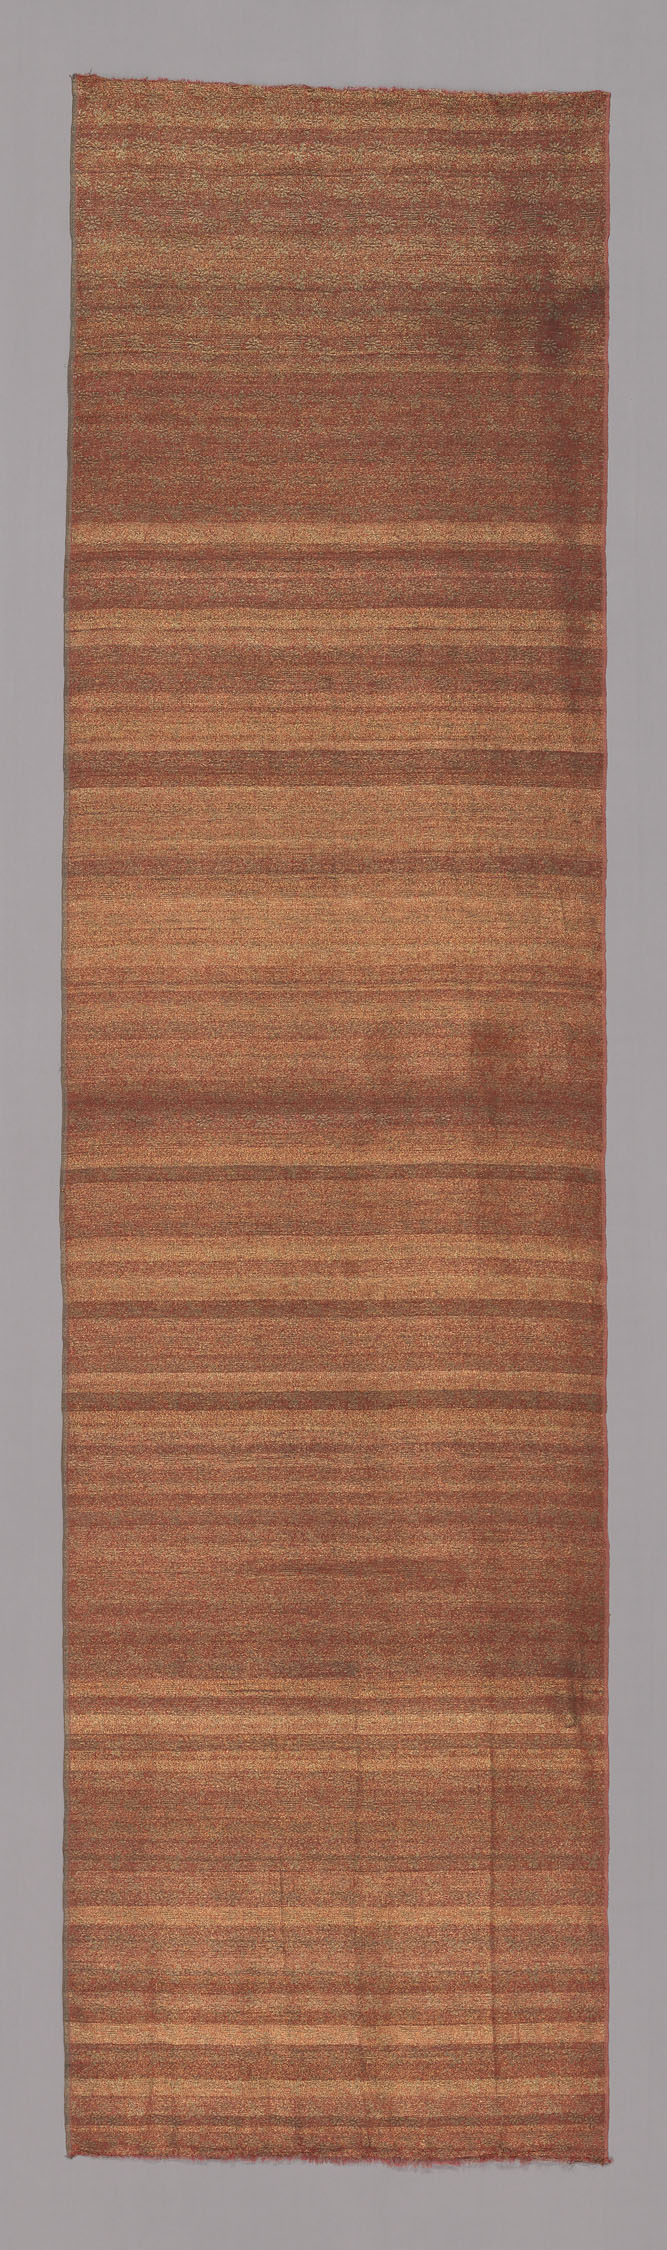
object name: Textile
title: Panel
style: Japanism, asian, meiji, late edo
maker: Japan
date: late Edo period (1789–1868)/ Meiji period (1868–1912), 20th century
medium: Brocaded satin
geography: Japan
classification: textile; weaving